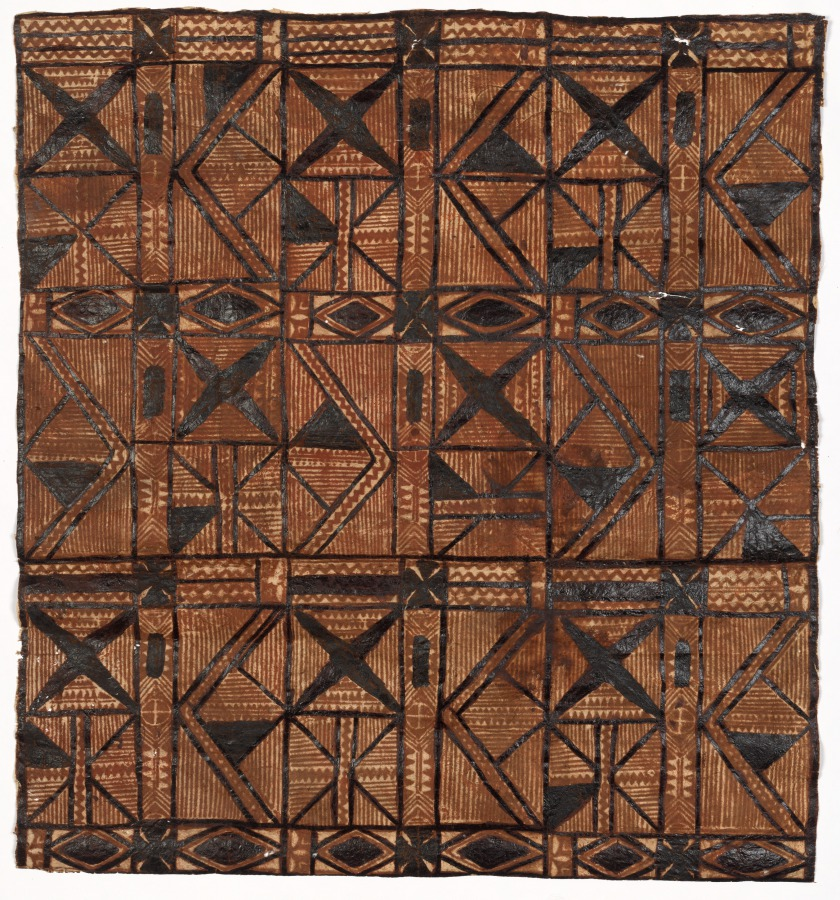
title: Tapa Cloth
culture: Oceania, Polynesia, Hawaii, early 20th century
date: early 20th century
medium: probably mulberry bark (Broussonetia papyrifera), painted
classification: Textile